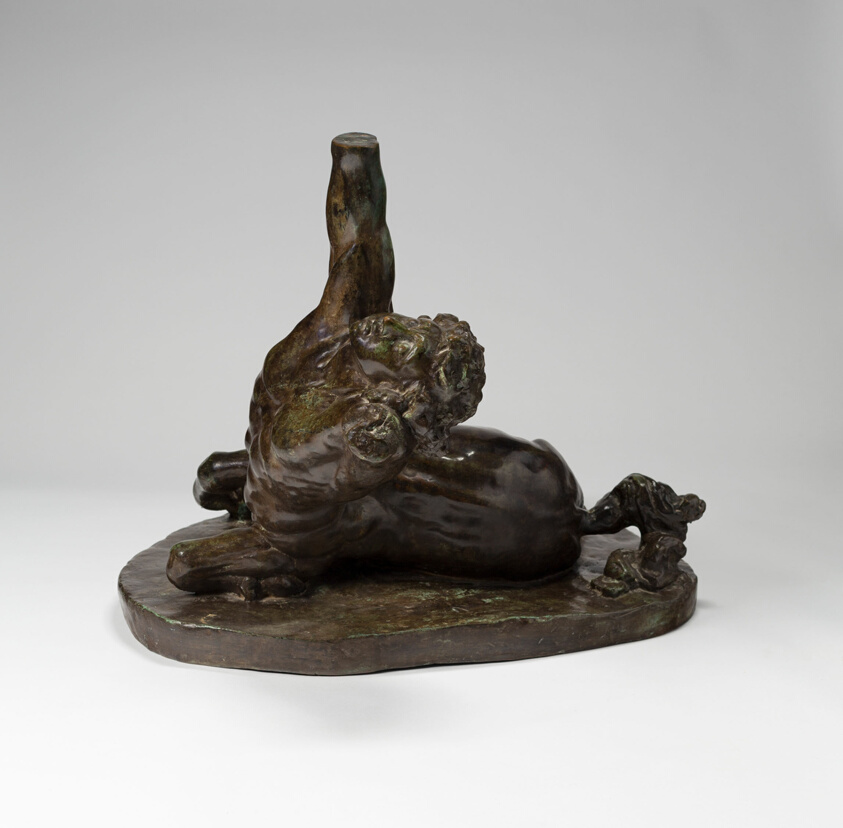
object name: Sculpture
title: Dying Centaur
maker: William Rimmer (American, born England, 1816–1879); Cast by Joseph Ternbach (American, born Austria, 1897–1982); New York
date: Modeled c. 1869, cast 1968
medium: Bronze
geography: New York City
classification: sculpture; american arts